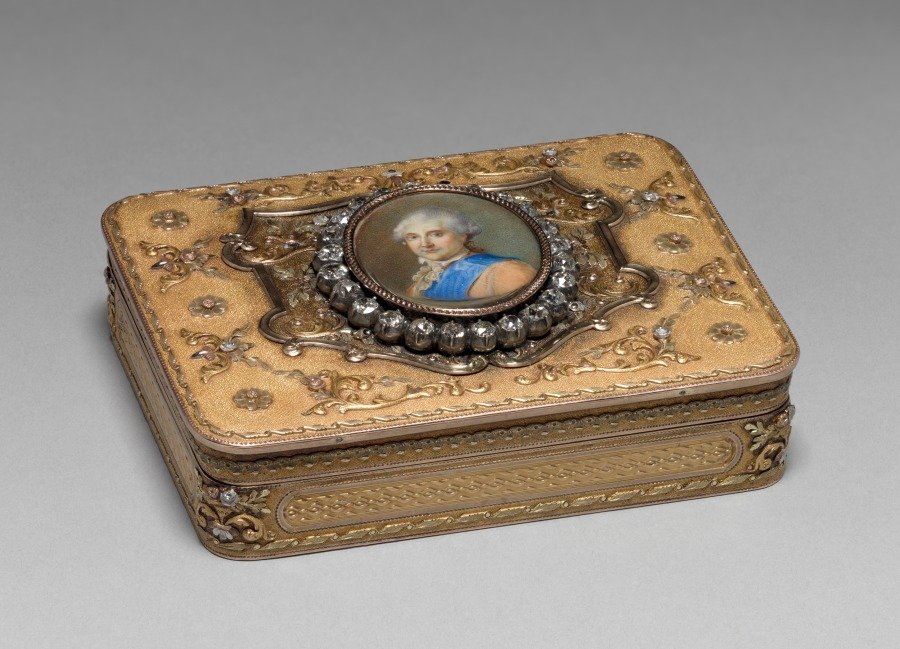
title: Portrait of a Man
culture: Switzerland, Neufchatel, mid-19th century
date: mid 1800s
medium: watercolor on ivory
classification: Miscellaneous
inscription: signed: "B."